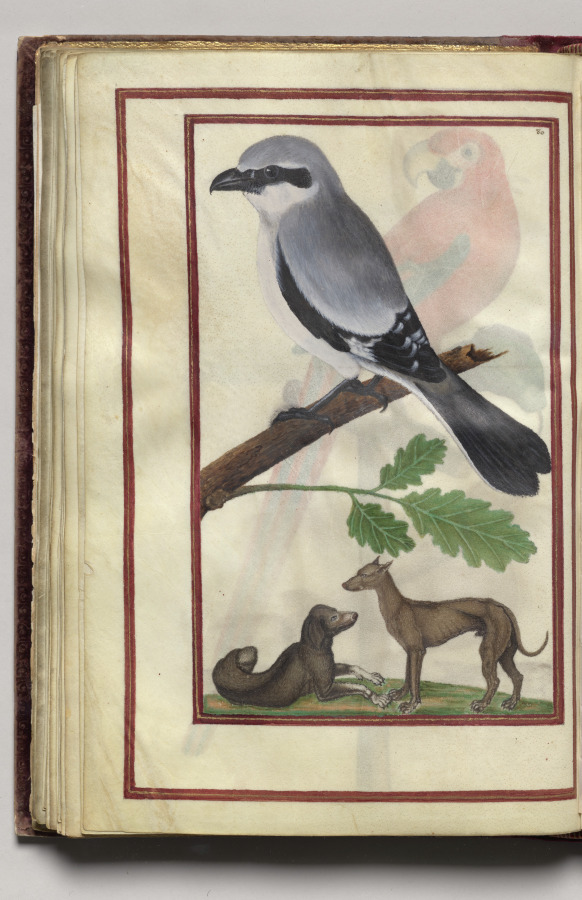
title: Gray Bird with Two Dogs, folio 38 (verso), from Florilegium (A Book of Flower Studies)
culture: France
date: 1608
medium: watercolor, ink, silver, and gold over occasional traces of pencil, on vellum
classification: Bound Volume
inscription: Dated: Poitiers 1608 (on frontispiece) Signed: On frontispiece in black ink, lower right: Van Kuyk Notation on drawing: Frontispiece: in pencil, lower margin: * élève de Van Kessel, peintre flammand (* in pencil also appears in front of Van Kuyk's name).